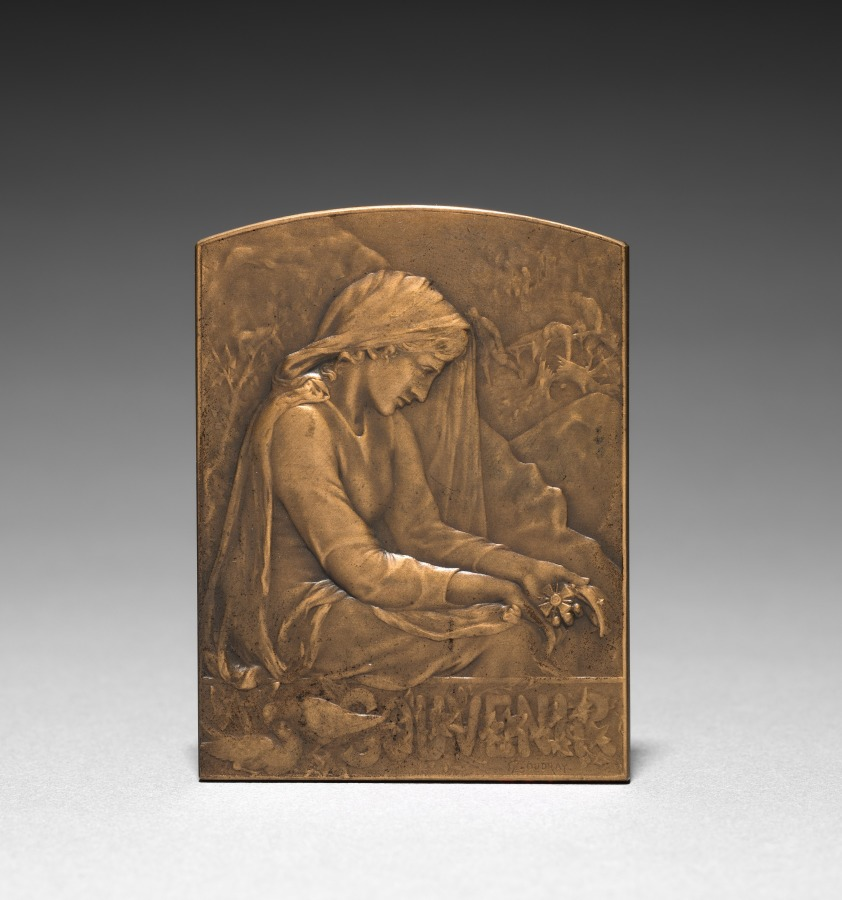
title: Medallion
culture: France, 19th century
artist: Marie Alexandre Lucien Coudray (French, 1864–1932)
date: 1900s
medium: bronze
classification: Metalwork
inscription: "SOUVENIR"; signed: "L. Coudray."